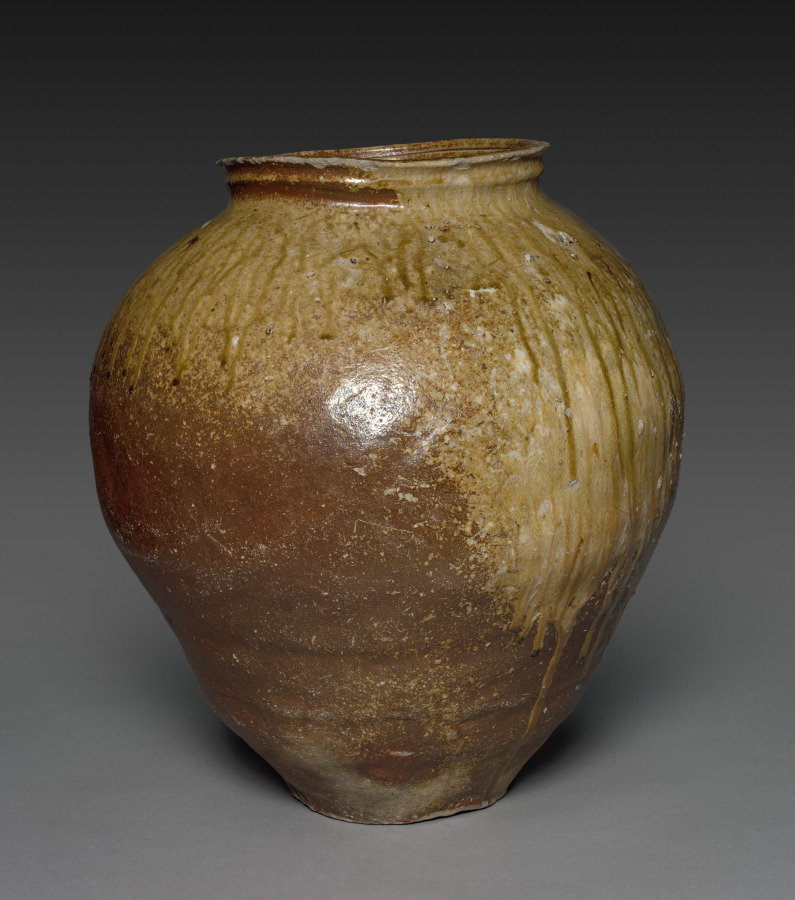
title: Storage Vessel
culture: Japan, Muromachi period (1392–1573)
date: 1400s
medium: stoneware with natural ash glaze (Echizen ware)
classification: Ceramic